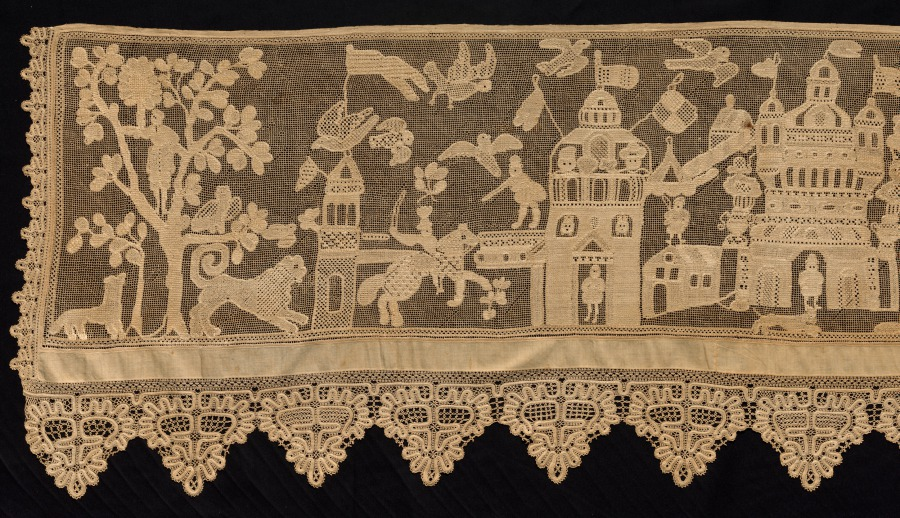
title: Lace Border with Battle Scene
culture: Russia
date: 1700s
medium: Linen; needle lace (cutwork and drawnwork), straight (continuous) bobbin lace, (tape lace) edging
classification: Lace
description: This valance, a decorative drapery made for attachment at the frame of the bed, was a typical object from the dowry of a bride in eighteenth and nineteenth-century Russia. The valance would have been made for the wedding night of a newlywed couple. The elaborate battle scene rendered in this lace is unusual and exceptional.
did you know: Handmade lace for marriage dowries was produced in large quantities in Russia during the eighteenth and nineteenth centuries.